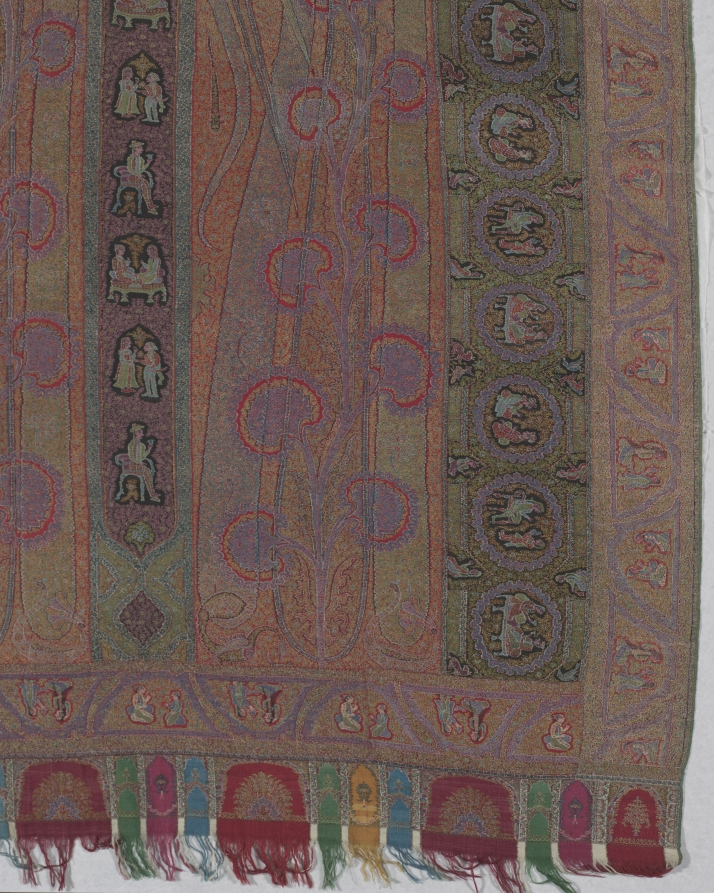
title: Long shawl with woven figures and animals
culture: India, Kashmir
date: c. 1885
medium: 2/2 twill tapestry weave, double interlocked and pieced: wool (possibly pashmina)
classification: Textile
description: Kashmir shawls from India were status symbols in Europe during the 1800s, and few are as rare as this woven example. Over 200 human figures take part in drinking, smoking, dancing, and falconry in the Indian princely scenes that enliven the shawl’s borders and four dark stripes. The stripes alternate with large elongated boteh, or paisley, motifs that intertwine with blossoming stems in a European style adapted by Kashmiri textile artists. This extraordinary woven shawl was probably made to dazzle the jury at one of the European expositions of industrial products, as almost all other figural shawls were embroidered. It was woven in many pieces and then skillfully joined with colorful harlequin end borders.